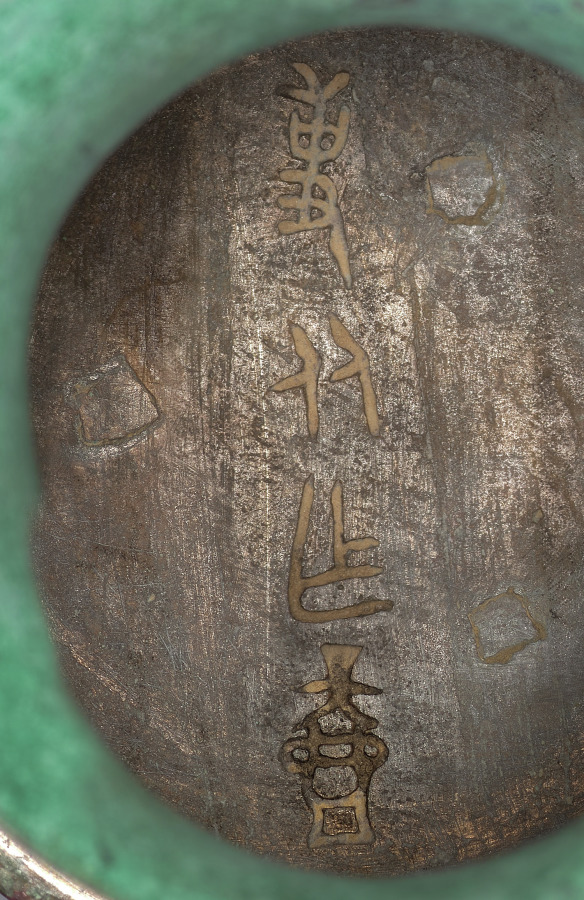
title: Wine Vessel (Hu) (lid)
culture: China, Western Zhou dynasty (c. 1046–771 BCE)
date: c. 1000–900 BCE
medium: bronze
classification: Metalwork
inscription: inscription inside top (cup): 事从作壺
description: This tall, slender bronze wine vessel, called a hu, has three bands of ornamentation: one above the foot, one around the neck, and one on the cover. Stylized birds or phoenixes are in the band around the neck, while the band on the cover and foot feature geometric dragons. The dragon and the phoenix may represent the Yin and Yang and would be equally appropriate on a bronze of either secular or religious purposes. It likely held liquids like wine at festive banquets or religious ceremonies.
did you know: When inverted, the cover forms a cup.